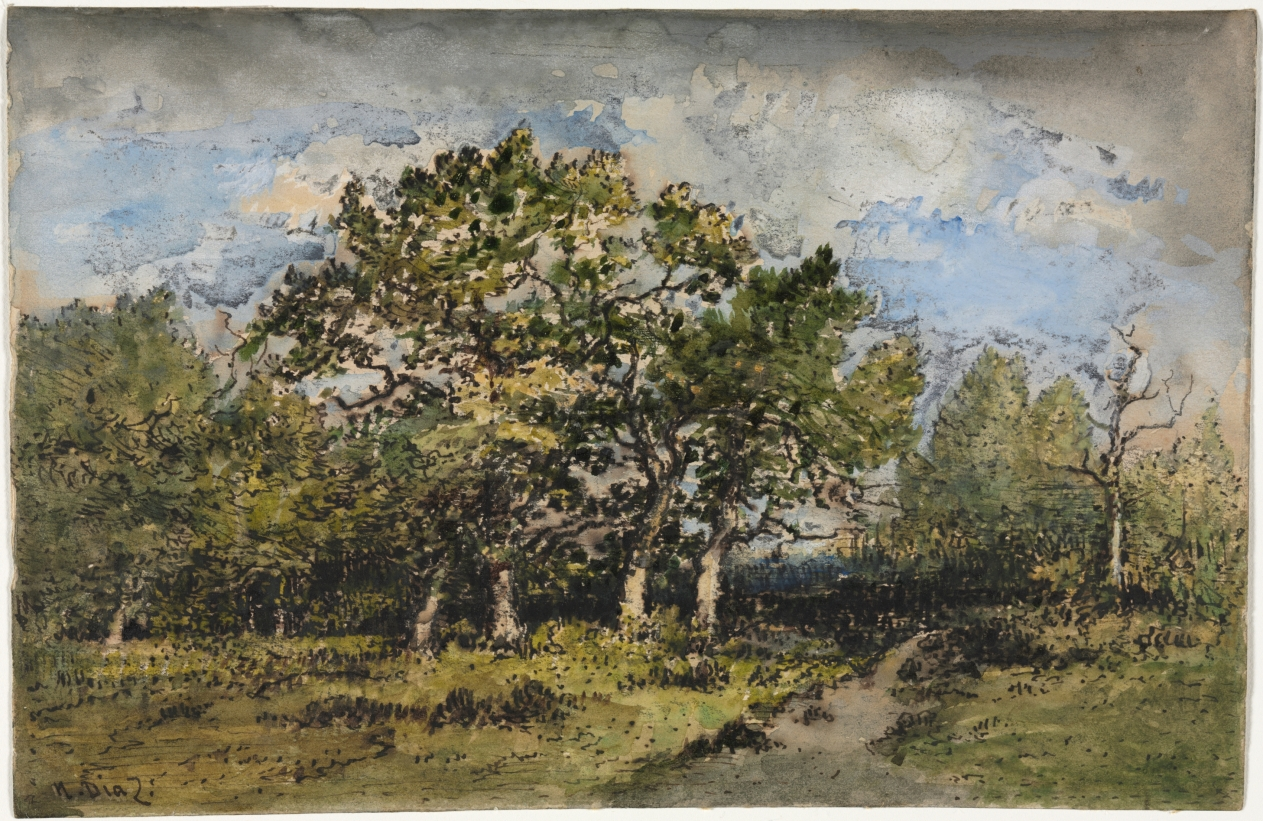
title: Landscape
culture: France, 19th century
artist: Narcisse Diaz de la Peña (French, 1807–1876)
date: c. 1860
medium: watercolor and gouache with pen and brown ink and graphite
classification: Drawing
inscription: signed, lower left, in brown ink: N. Diaz; verso, center, in graphite: 6435 [upside down]; lower right, in graphite: hw2x--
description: This is a rare watercolor by Narcisse Diaz, who worked primarily in oil. The view is likely from the forest of Fontainebleau, near the village of Barbizon. In the 1830s, Diaz and other painters like Jean-François Millet frequently painted there, out of doors, directly from nature.